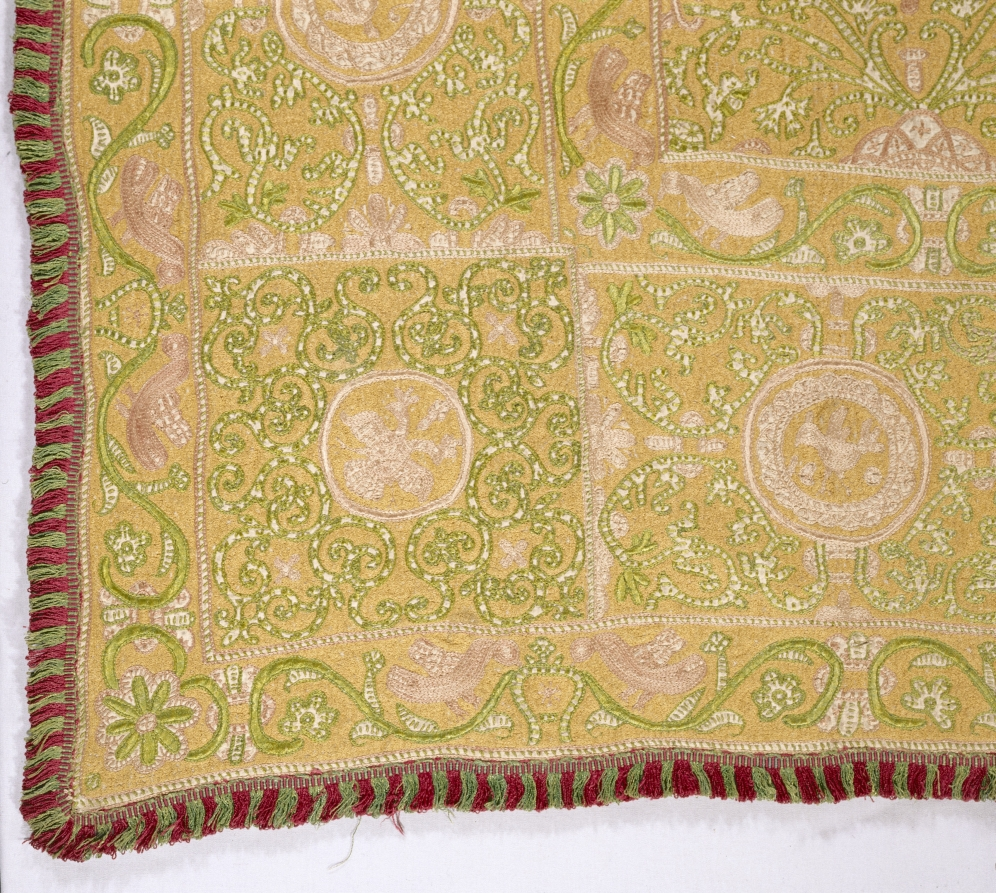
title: Embroidered Bedspread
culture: Portugal, 17th-18th century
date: 17th-18th century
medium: embroidery; silk on linen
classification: Embroidery